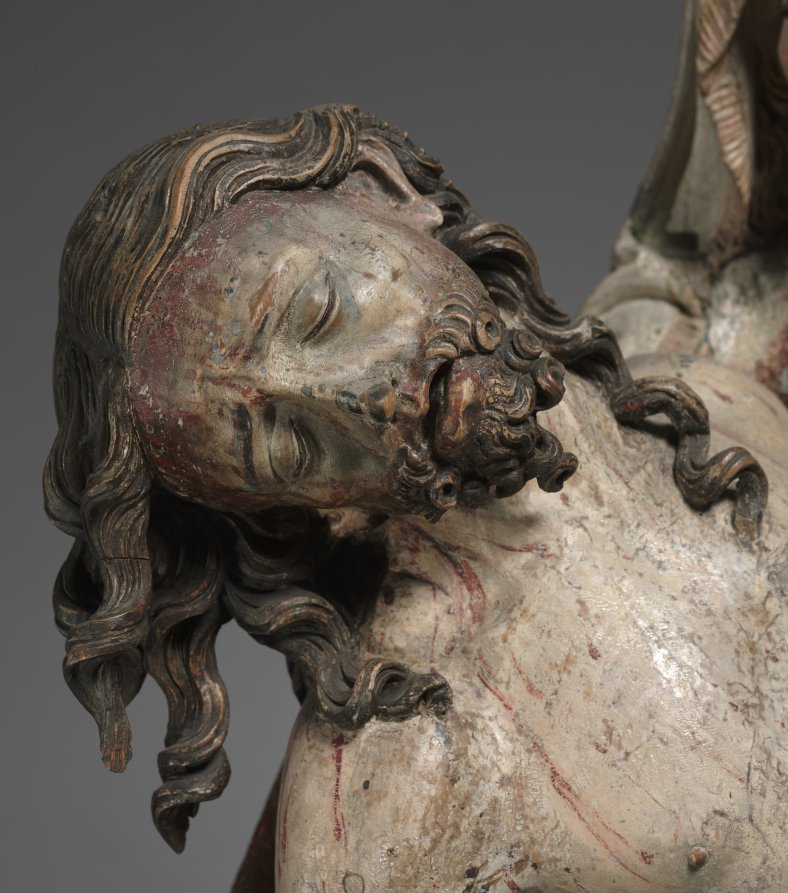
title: Vesperbild (Pietà)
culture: Germany, Upper Bavaria, 16th century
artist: Master of Rabenden (German)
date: c. 1515–20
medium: lindenwood, polychromed and gilded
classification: Sculpture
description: Depicting the Virgin cradling Christ’s dead body, works like this one were known in German as vesperbilds, owing to their incorporation into the liturgy of the evening prayer (vespers) on Good Friday. The word pietà—from the Latin pietas, meaning "piety" or "compassion"—was also used to describe such works. Like other devotional image types that emerged in southern Germany in the later medieval period, vesperbilds encouraged viewers to contemplate Christ’s suffering and empathize with the Virgin’s sorrows more directly and emotively than ever before. This anonymous German artist is named after one of his most important works, the high altar of the church of Rabenden in the Chiemgau, the foothills of the Alps. The sculpture was likely placed in a secondary chapel in a Bavarian church.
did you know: This sculpture sensitively depicts the Virgin cradling the body of Christ. This devotional image was likely placed near the altar in a German chapel. Imagine standing in a small, quiet chapel looking up at these lifelike figures with flickering candles casting dappled light onto their surface.